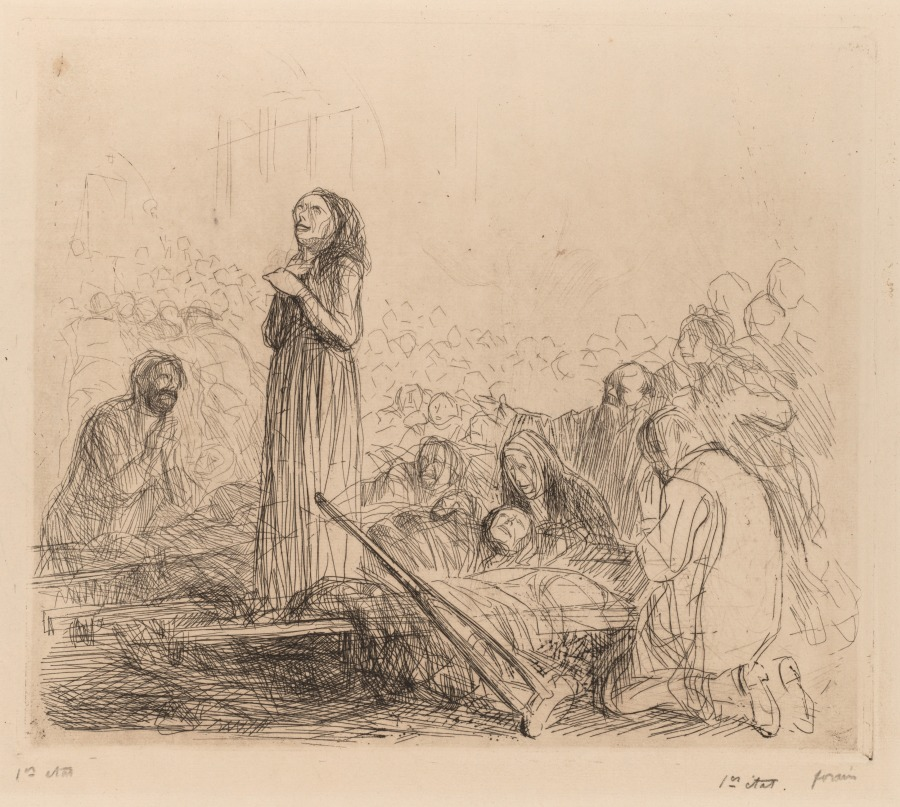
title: The Miracle before the Blessed Sacrament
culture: France, late 19th-early 20th century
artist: Jean Louis Forain (French, 1852–1931)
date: 1912–13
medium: etching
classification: Print